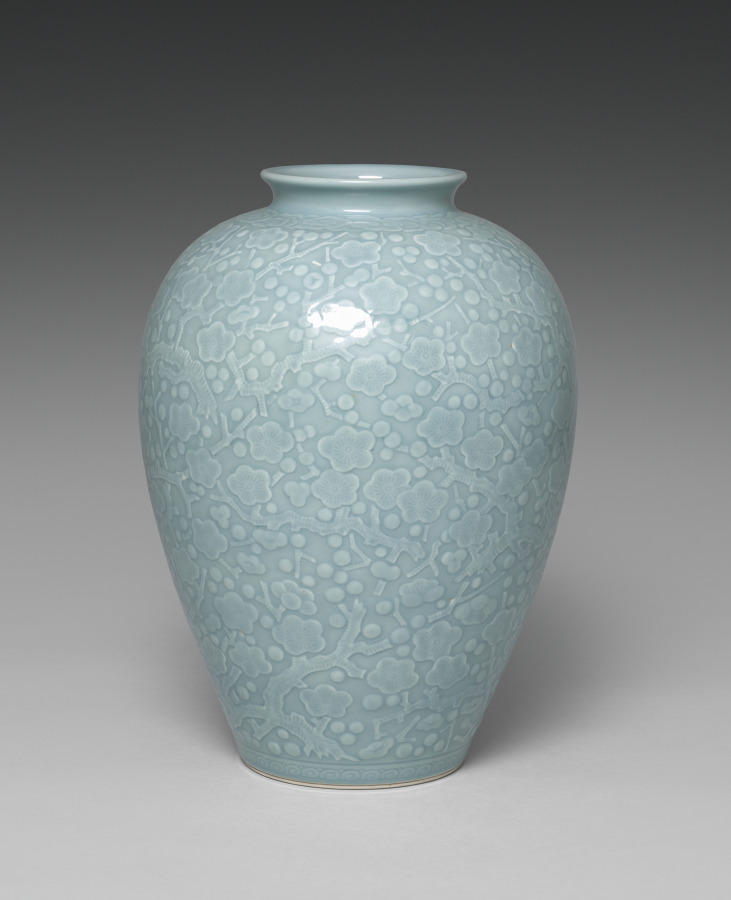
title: Vase with Plum Blossoms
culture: Japan, Taishō period (1912–26) or Shōwa period (1926–89)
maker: Seifū Yohei IV (Japanese, 1872–1951)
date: 1914–46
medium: Glazed porcelain with molded and carved design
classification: Ceramic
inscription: 清風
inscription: "James & Christine Heusinger/ Japanese Art Collection"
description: Although inspired by representations of flowering plum, or prunus, in Chinese ceramics, the dense allover design of branches on this vase also resembles Japanese textile patterns. As they might on a kimono, the trunks run in alternate directions up and down the surface. At the foot, or bottom of the vase, is a classic band of spirals, and at the neck, or narrowed portion near the opening, is a collar of clouds.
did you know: Yohei IV’s allover design of budding and flowering plum blossoms, strongly associated with spring and with China, is combined with his father’s “water color” glaze on this vase.